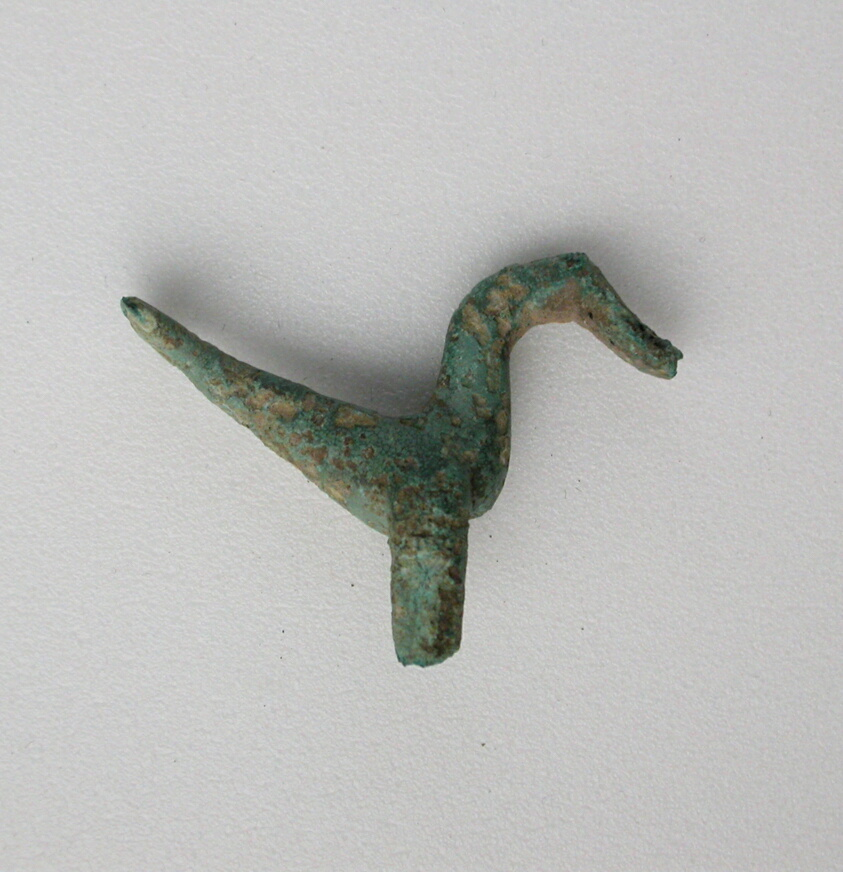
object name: Decorative Arts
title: Bird with Flat Tail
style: geometric, ancient, greek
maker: Greek; Thessaly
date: Geometric Period (800–600 BCE)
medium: Bronze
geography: Greece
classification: votive offering; ex-voto; decorative arts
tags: bird